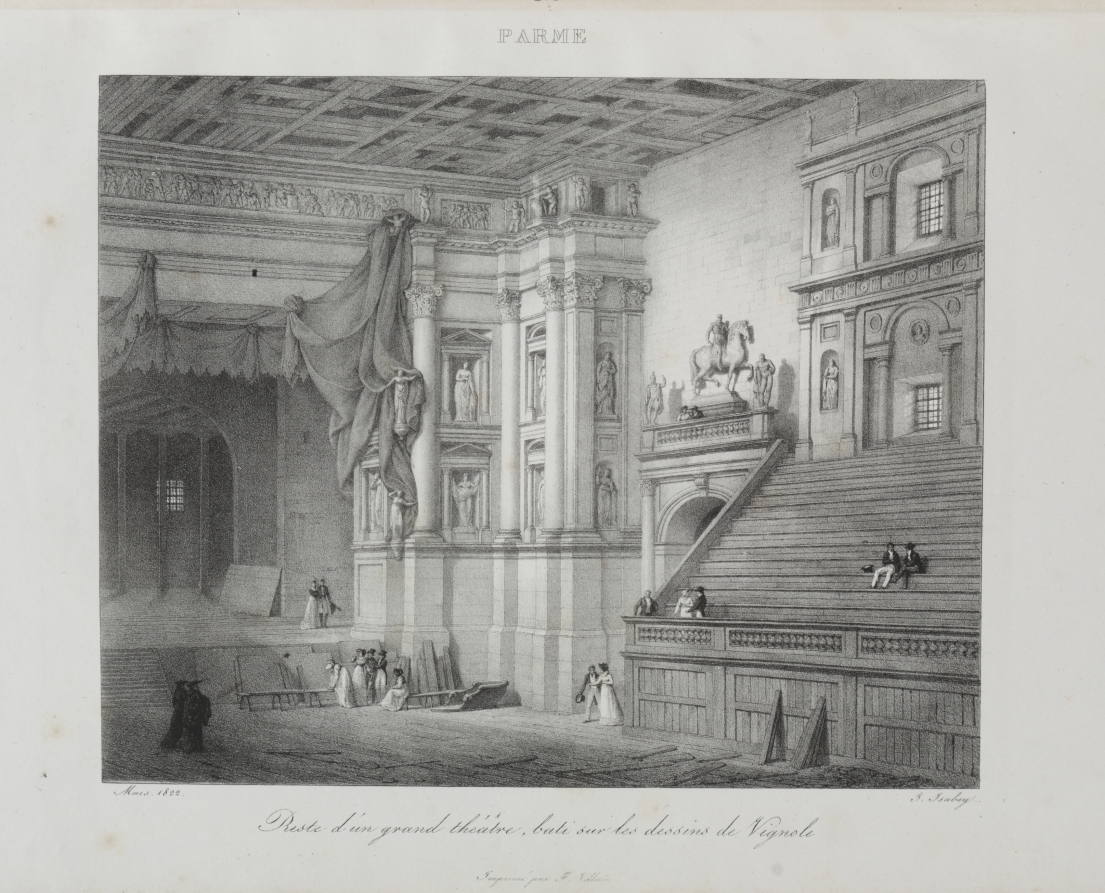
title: Voyage en Italie en 1822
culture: France, 19th century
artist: Jean-Baptiste Isabey (French, 1767–1855)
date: 1833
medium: lithograph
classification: Bound Volume